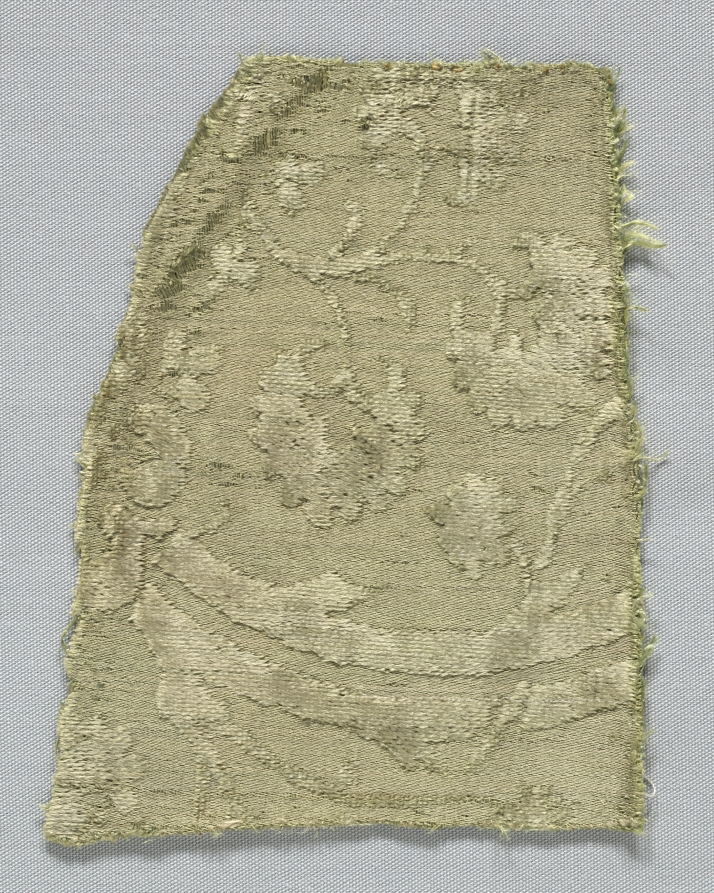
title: Fragment of a Chasuble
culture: Italy, beginning of the 15th century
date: 1400–1420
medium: velvet (cut and voided); silk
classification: Velvet